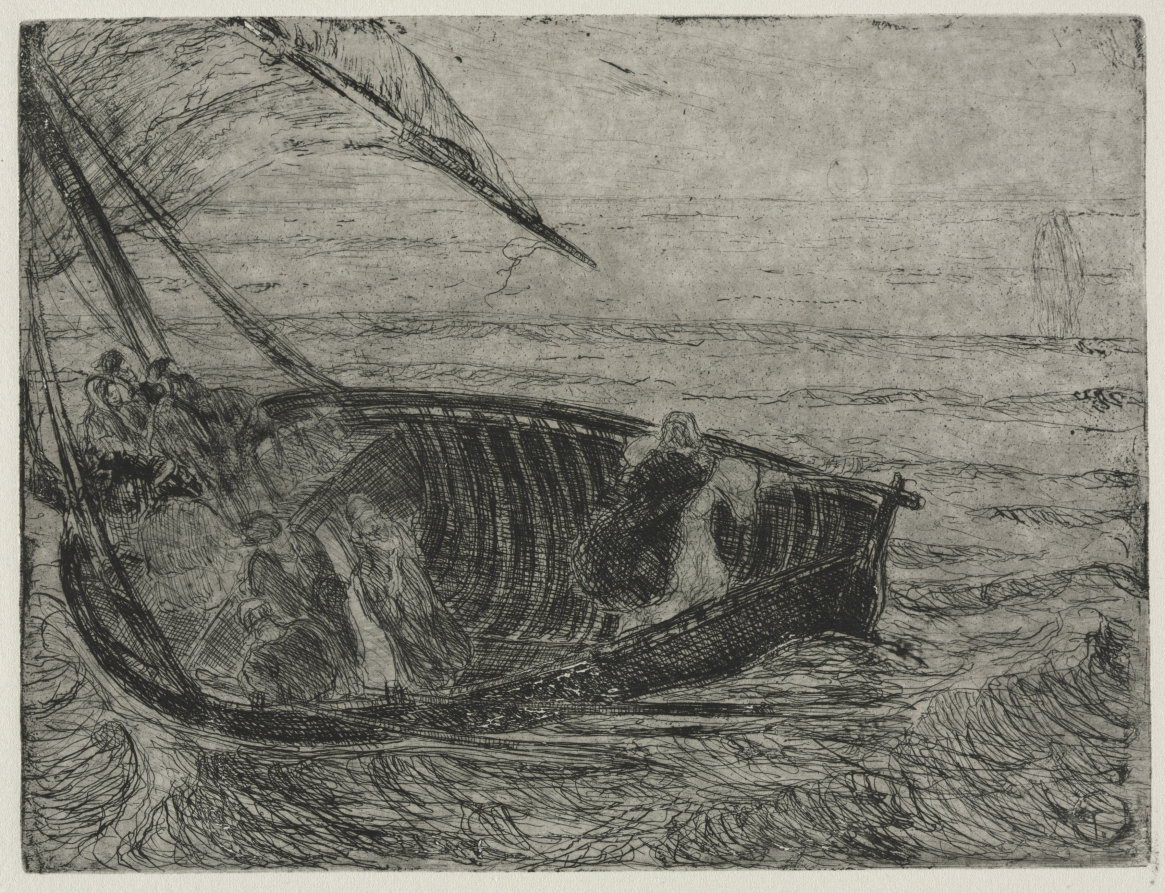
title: Christ Walking on the Waters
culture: America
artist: Henry Ossawa Tanner (American, 1859–1937)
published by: published posthumously by artist's son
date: c. 1910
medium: etching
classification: Print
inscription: signed in plate with artist's monogram